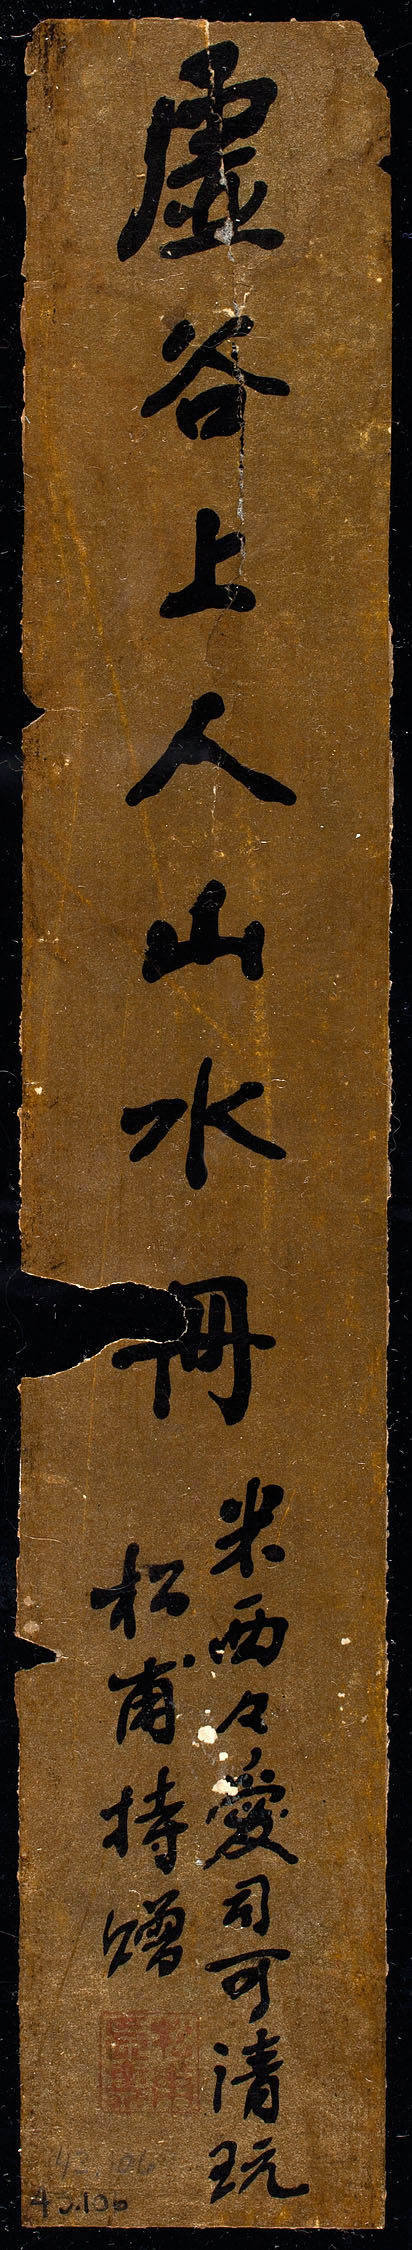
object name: Painting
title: Title slip 山水册頁 封面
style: Chinese (culture or style)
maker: Liu Songfu (Chinese, ?- c. 1917)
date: Qing dynasty (1644–1911), 1895/96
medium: Ink on paper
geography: China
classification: painting; album leaf